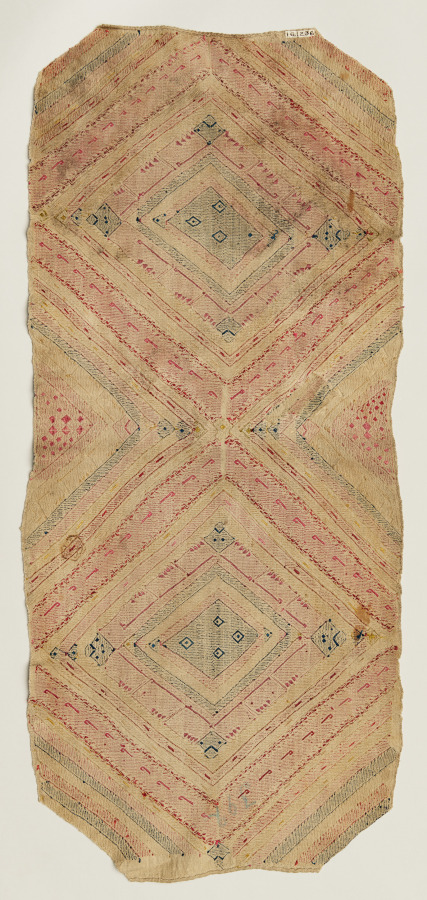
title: Fragment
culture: Africa, North Africa, Morocco, Moroccan embroiderer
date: 1600s-1700s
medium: Silk, linen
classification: Embroidery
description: This textile fragment, possibly made from linen, is densely embroidered with silk threads in various shades of pink, red, yellow, and blue. The design is organized as a series of nested squared and some of the bands are patterned with repeating designs that somewhat resemble letters of the Arabic alphabet. The artist didn't use silk thread to make these, but instead stitched around the desired shapes. The letter-like patterns are thus actually parts of the plain base fabric showing through.